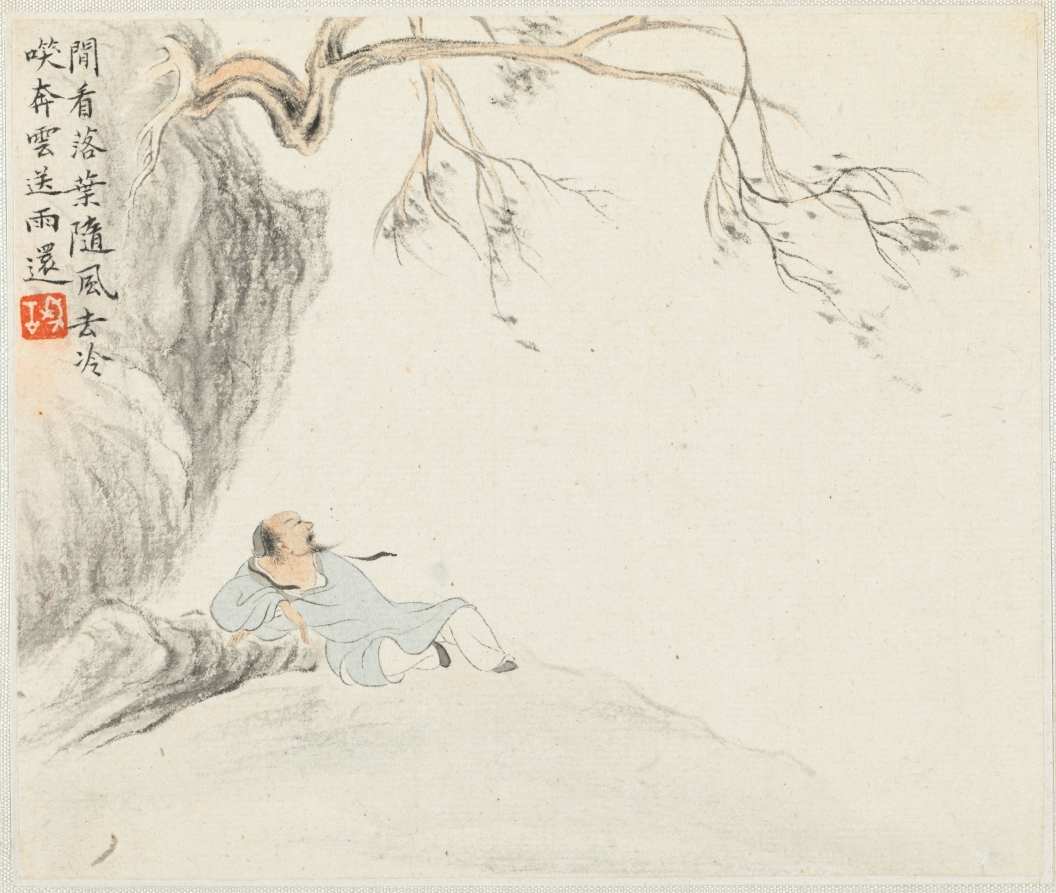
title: Album of Landscape Paintings Illustrating Old Poems: A Man Reclining and Enjoying the View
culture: China, Qing dynasty (1644-1911)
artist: Hua Yan (Chinese, 1682–c. 1765)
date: 1745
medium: album leaf, ink and light color on paper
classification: Painting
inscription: Calligraphy and seal, upper left corner